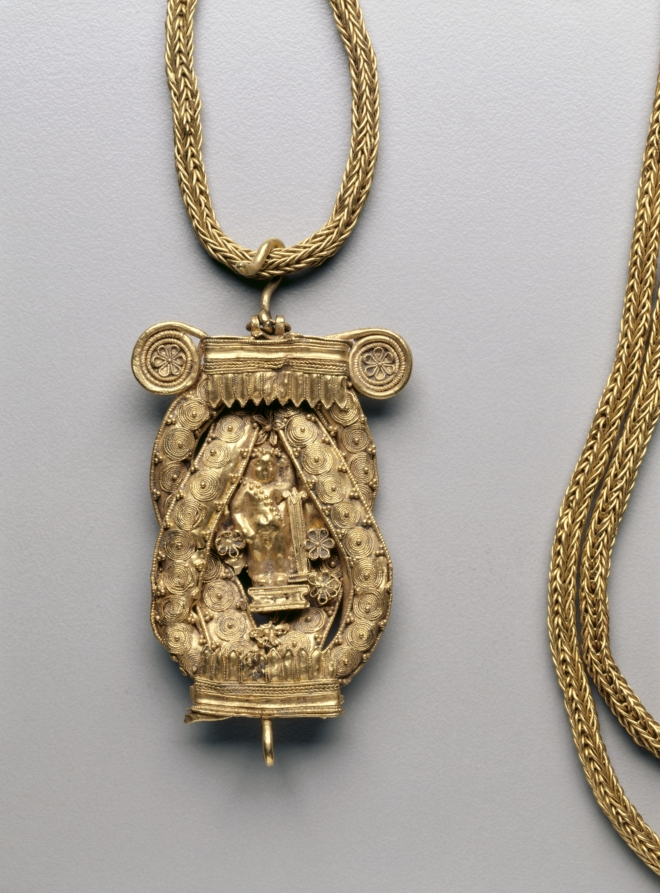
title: Chain and Pendant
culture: Greece, Hellenistic period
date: 200s BCE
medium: gold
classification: Jewelry